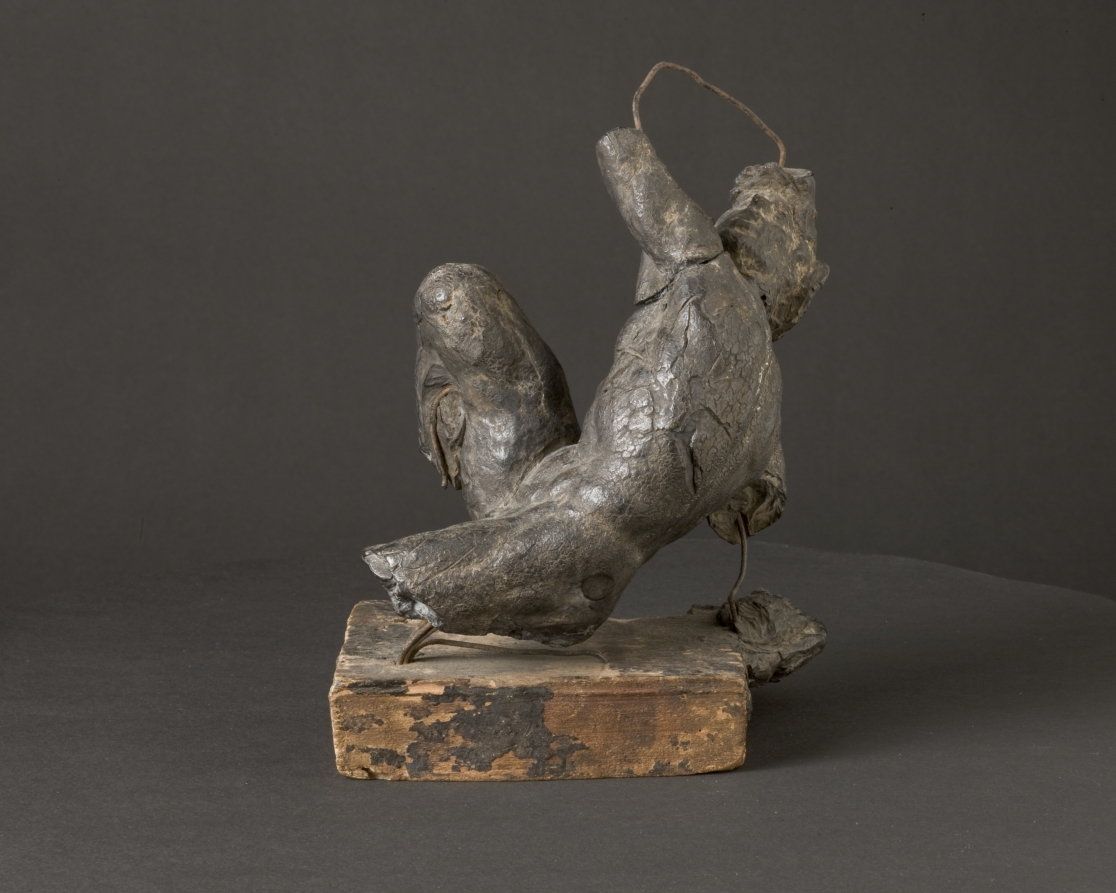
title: Model for a Fallen Warrior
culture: Italy, 16th century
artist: attributed to Giovanni Francesco Rustici (Italian, 1474–1554)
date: c. 1520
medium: wax on a metal armature, mounted on wood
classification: Sculpture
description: Giorgio Vasari (1511–1574), an influential writer and painter, notes in his biography of his contemporary Rustici, that the artist sculpted terracotta battle scenes of groups of horses "with men on their backs or under them." This wax model may be a study for such a group, showing a contorted, helmeted warrior bracing himself after falling to the ground. The figures for these projects were most likely inspired by those in Leonardo's monumental wall painting depicting the Battle of Anghiari for the Hall of the Five Hundred in the Palazzo Vecchio, Florence. Although the fresco was never completed, its pictorial scheme was well known. Rustici later collaborated with Leonardo, and was undoubtedly aware of the major commission and its dynamic portrayal of war.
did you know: Sixteenth-century sculptors often sketched their ideas in three dimensions using wax, clay, or stucco.